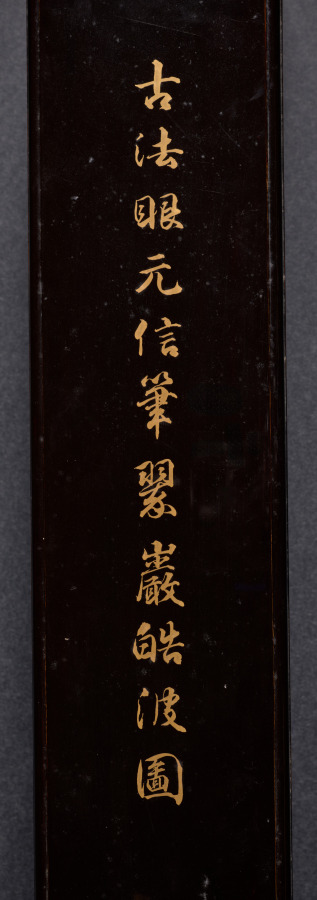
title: Rocks and Waves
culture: Japan, Muromachi period (1392–1573)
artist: attributed to Kano Motonobu (Japanese, c. 1476–1559)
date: early to mid-1500s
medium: sliding door fragment mounted as a hanging scroll; ink and gold wash on paper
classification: Painting